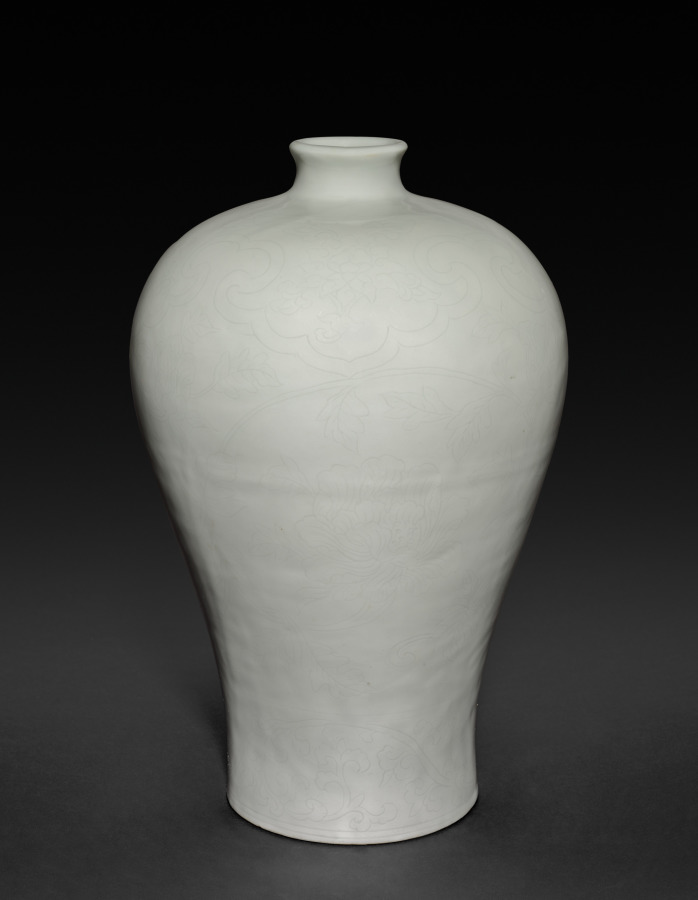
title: Meiping Vase with Cloud Collars and Peony Sprays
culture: China, Jiangxi province, Jingdezhen kilns, Ming dynasty (1368-1644), Yongle period (1403-1424)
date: 1403–24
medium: porcelain with incised decoration and white glaze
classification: Ceramic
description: This beautiful vase, called a meiping, is a testimony to the extremely high standards demanded for imperial white porcelain of the Yongle period. It is exquisitely potted and subtly decorated with "hidden decoration" (anhua) incised into the body. The clear glaze over the white body has a luster and purity; the white color radiates with a soft glow like melting snow, described by the Chinese connoisseurs as tianbai, or "sweetwhite." Tianbai wares were produced for use in imperial offerings and have always been considered a great achievement of the Yongle period.